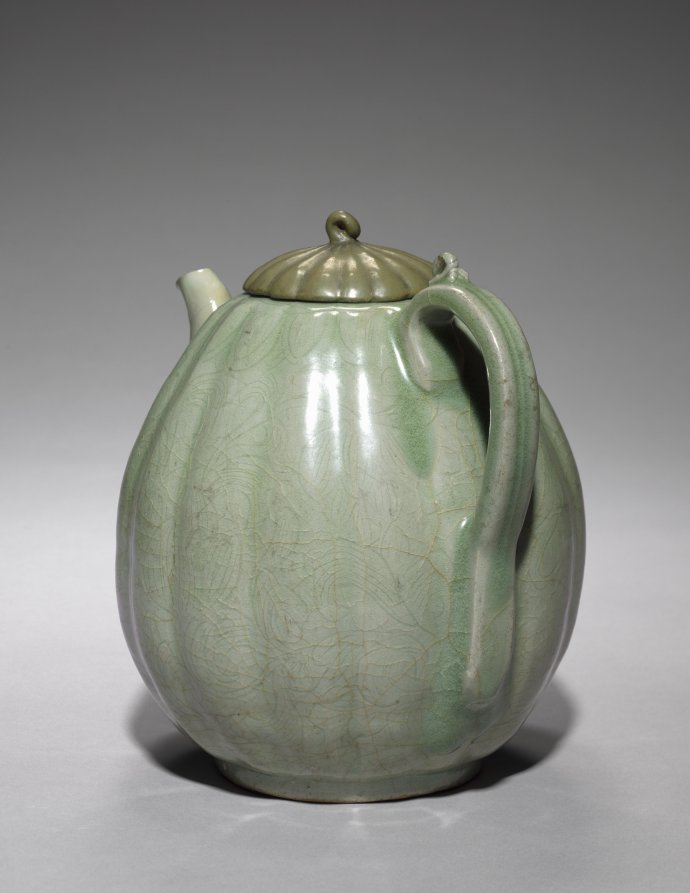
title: Melon-shaped Wine Ewer with Incised Chrysanthemum Design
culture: Korea, Goryeo dynasty (918–1392)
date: 918–1392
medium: pottery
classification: Ceramic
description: As early as the seventh century, the practice of drinking tea and wine became an important part of elite culture in Korea. Elites of the Goryeo period commissioned a variety of types of utensils and vessels including this elegant pot, not only to make their drinking experience more exciting, but also to show their appreciation of nature.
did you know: Originally the lid was not coupled with this pot.